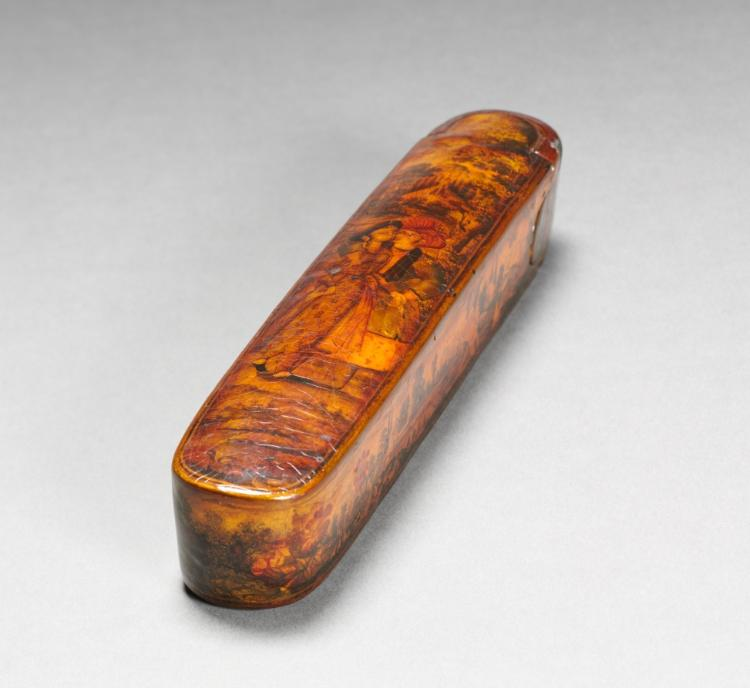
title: Pen and Ink Box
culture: Iran, probably Isfahan, Safavid period (1501–1722)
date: 1667–98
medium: Varnished lacquer and opaque watercolor over papier-mâché, ink, and copper alloy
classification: Lacquer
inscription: 1109